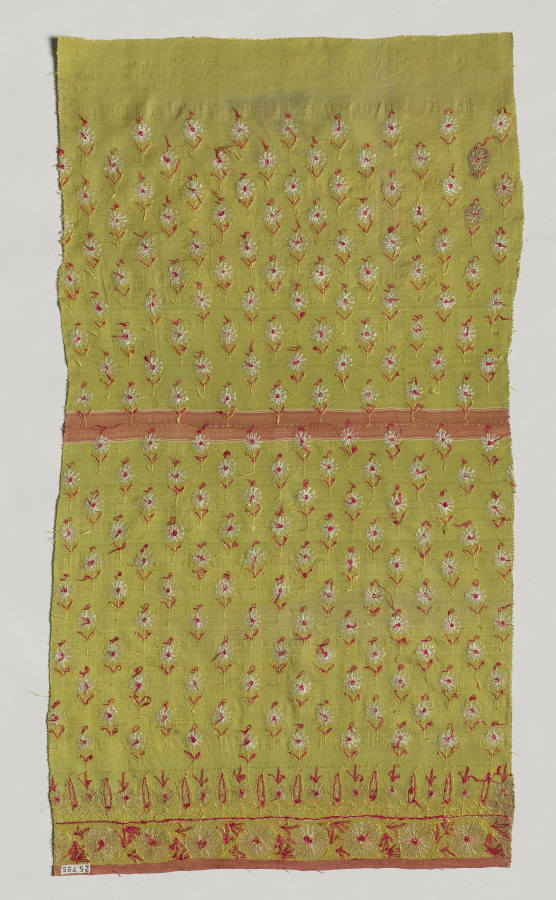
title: Piece of a Skirt (Ghagra)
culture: Western India, Gujarat, Kachchh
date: late 1800s–early 1900s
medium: silk on silk tabby ground, embroidery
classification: Embroidery